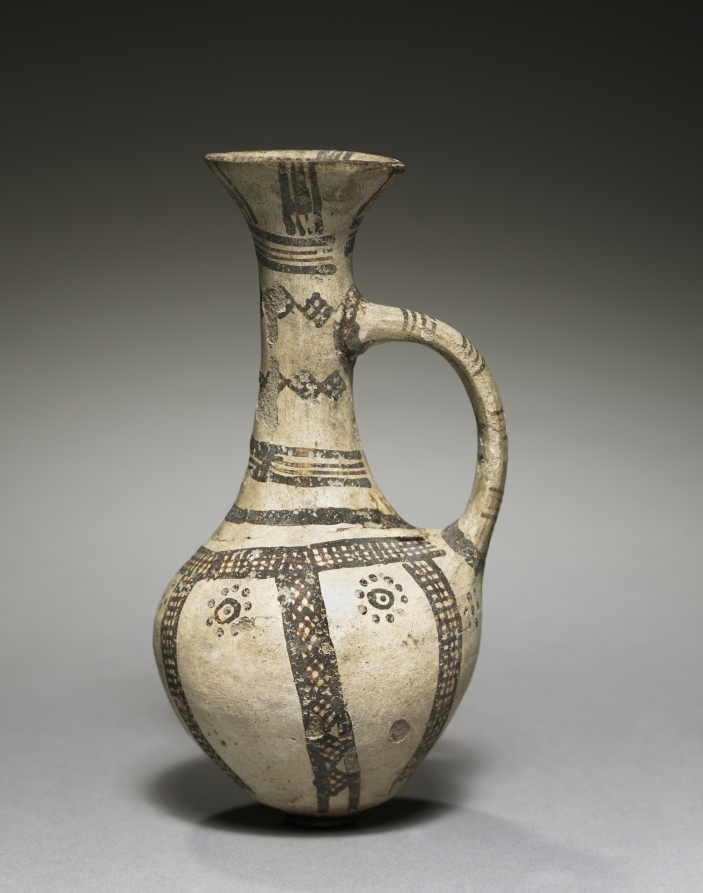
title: Jug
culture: Cyprus, late Cypriot II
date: c. 1450–1200 BCE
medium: white slip ware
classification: Ceramic